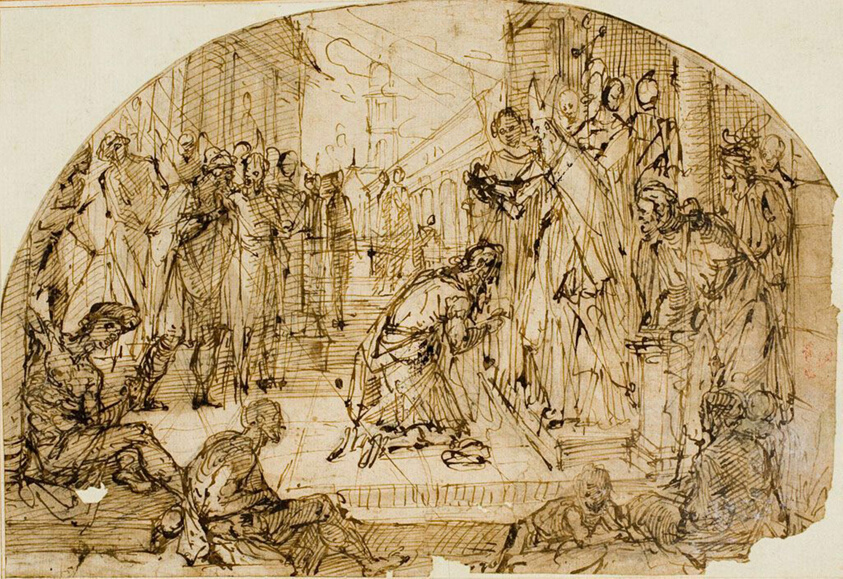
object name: Drawing and Watercolor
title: Bishop Blessing a Kneeling Man OR Meeting of Emperor Theodosius and Bishop Ambrose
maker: Attributed to Luigi Benfatto; Italian, c. 1544-c. 1609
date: c. 1600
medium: Pen and brown ink with brush and brown wash, over graphite, on cream laid paper, laid down on off-white laid paper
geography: Italy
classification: ink with wash; drawings (visual works); prints and drawing